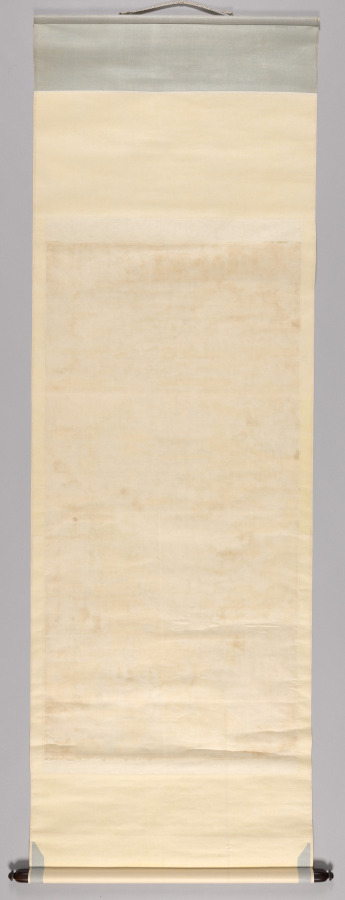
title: Scenic View of Suzhou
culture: China, Qing dynasty (1644–1911), Qianlong reign (1736–95)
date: 1736–95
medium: Hanging scroll; polychrome woodblock print; ink and color on paper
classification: Print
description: In the 1600s, printing flourished in such Jiangnan cities as Nanjing, Suzhou, Hangzhou, and Huizhou, evolving from privately enjoyed illustrated books printed in color to more commercialized single-sheet color prints that were hung on walls and became part of the rich urban visual culture.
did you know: Woodblock printing in color reached a height in China in the 1600s to 1700s. The prints were executed by means of sets of separate blocks, each carved to print a different color.